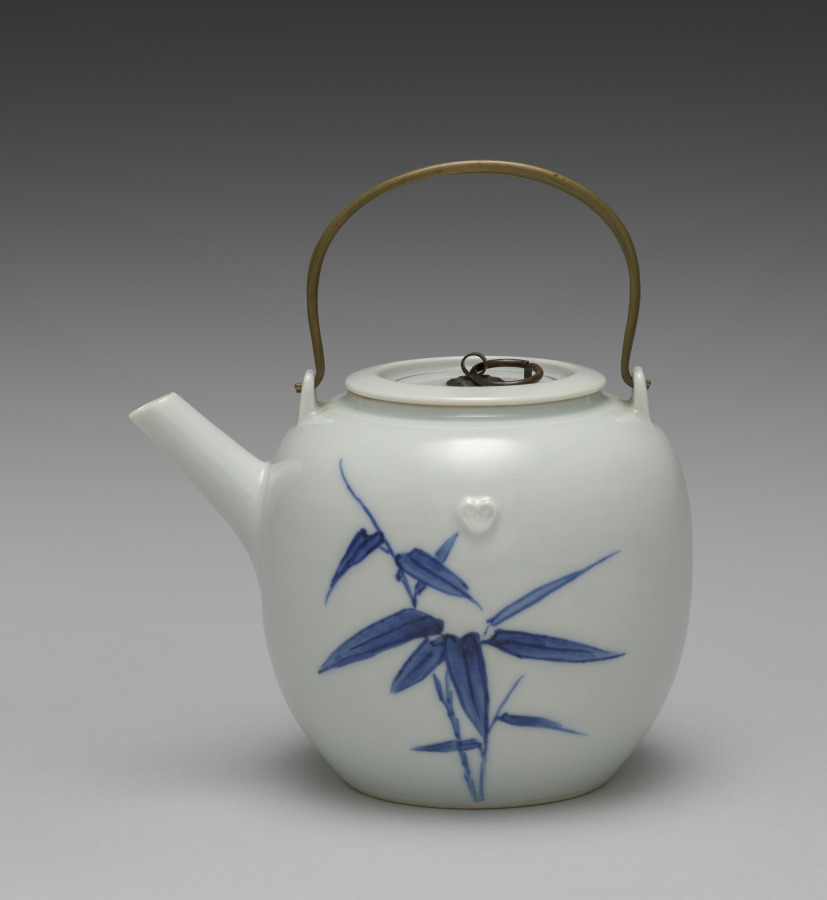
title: Teapot with Bamboo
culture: Japan, Taishō period (1912–26) or Shōwa period (1926–89)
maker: Seifū Yohei IV (Japanese, 1872–1951)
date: 1914–46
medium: Porcelain with underglaze blue, molded design and metal handles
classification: Ceramic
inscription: 清風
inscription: 清風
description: This teapot has a well-balanced design of bamboo in underglaze blue and nyoi staff-head motifs applied to both sides at the shoulder.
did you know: There is a seal on the base of the teapot.